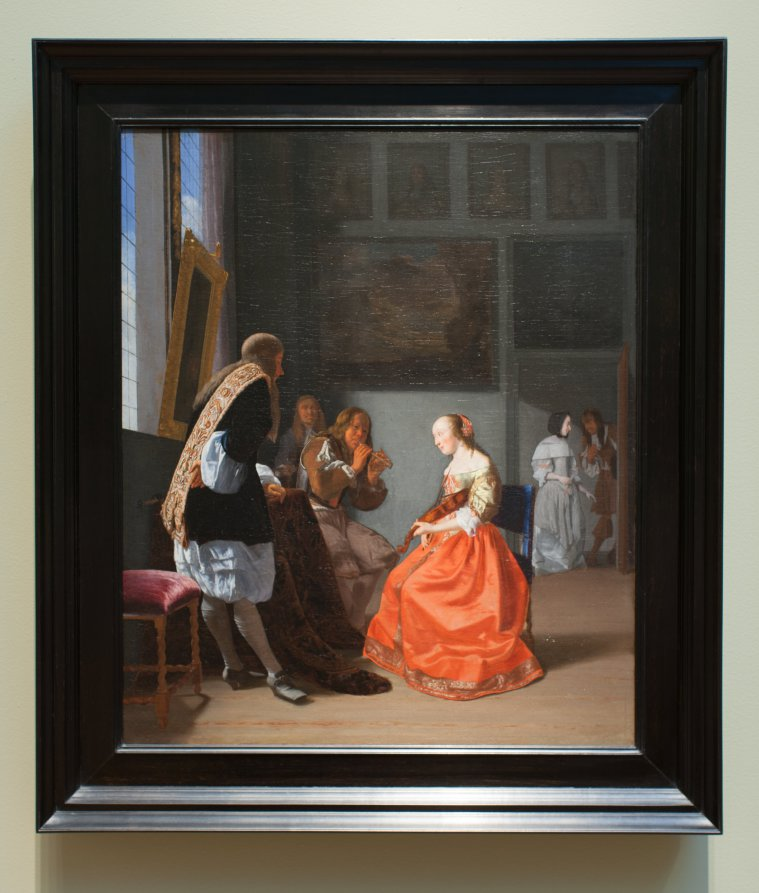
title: A Musical Company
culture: Netherlands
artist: Jacob Ochtervelt (Dutch, 1634–1682)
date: c. 1668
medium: oil on canvas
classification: Painting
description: Despite the calm demeanor and elegant disposition of the figures, this interior scene probably represents the interior of a brothel, signaled by the row of female portraits in the background, rarely found in other paintings of this period. The depiction of music provides another clue to the subject. The recorder and violin, played without scores, were perceived as cruder instrumentation and associated with prostitution, versus the elegant and complicated musicmaking seen in the work by Pieter de Hooch in the museum's collection.